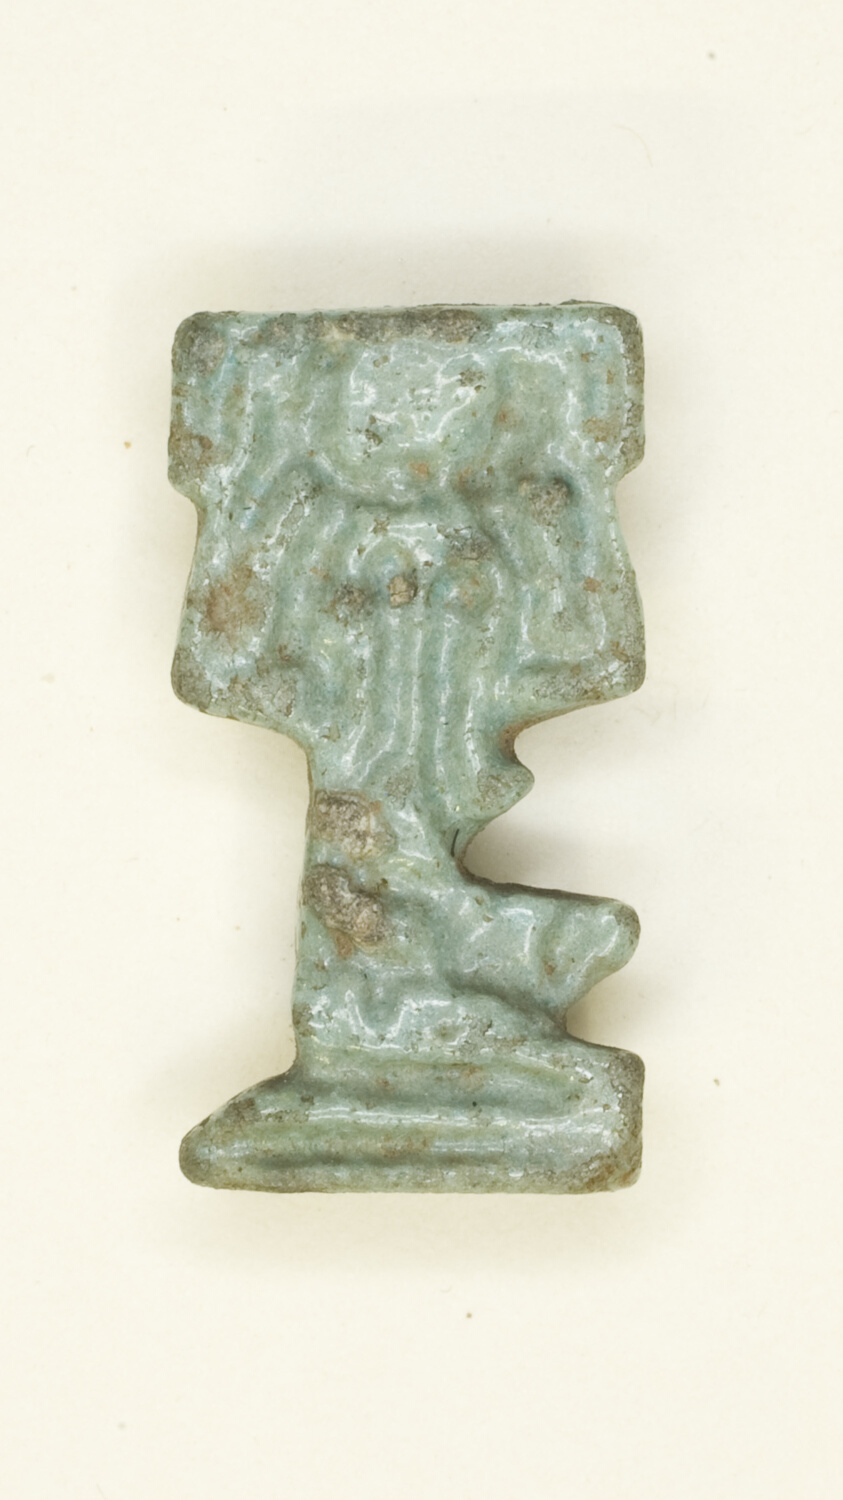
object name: Costume and Accessories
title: Amulet of the God Shu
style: egyptian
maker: Egyptian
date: Late Period, Dynasty 26–31 (664–332 BCE)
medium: Faience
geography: Egypt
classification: amulet; jewelry; ceramics; ancient art; costume; faïence (composite material)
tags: gods (deities)